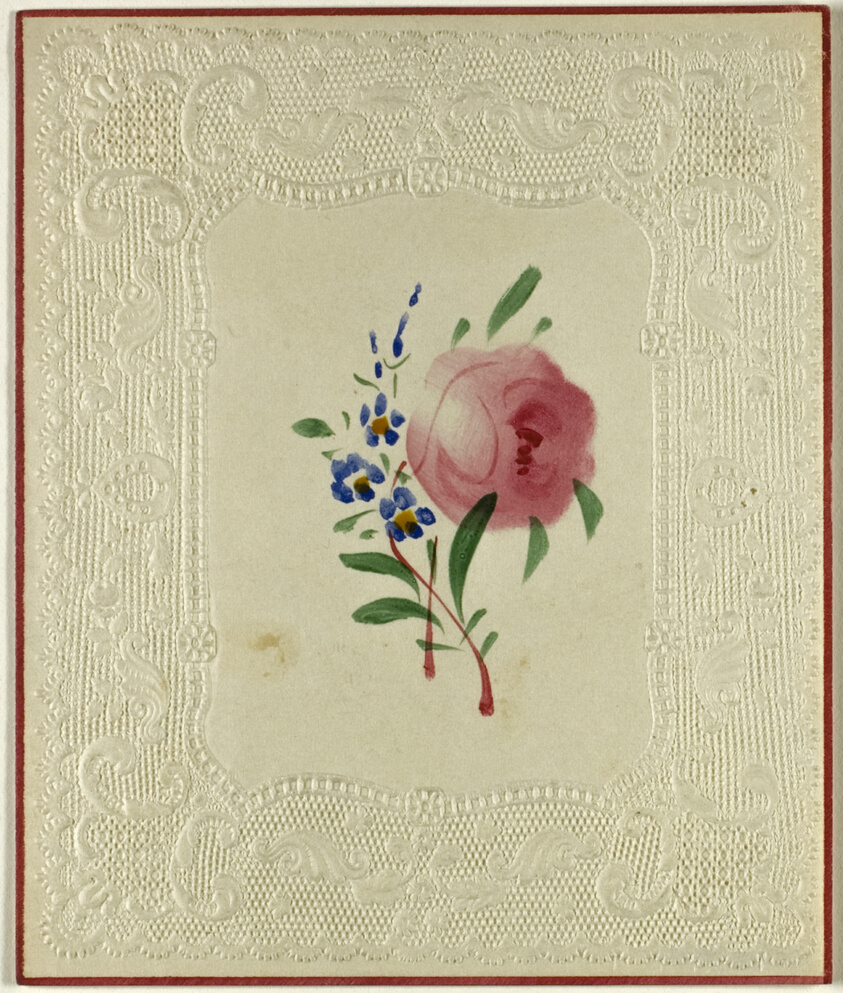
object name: Drawing and Watercolor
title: Untitled Valentine (Large Pink and Small Blue Flowers)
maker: Unknown Artist; English, 19th century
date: c. 1840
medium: Watercolor on embossed ivory wove paper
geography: England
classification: valentine; prints and drawing; paper